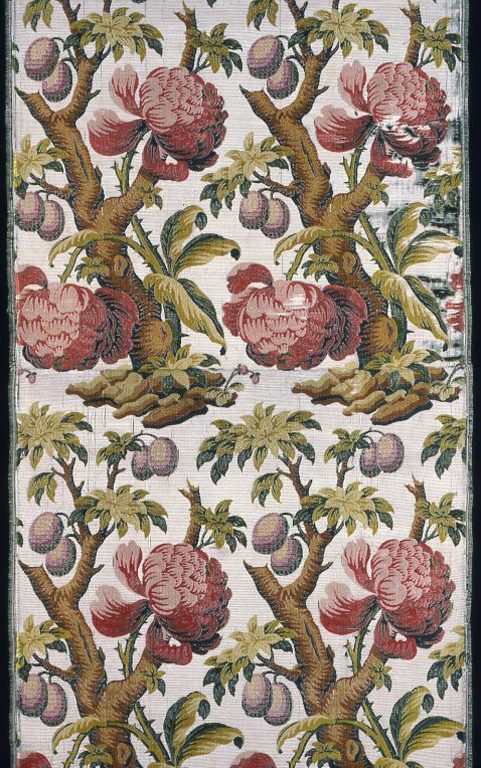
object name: Textile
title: Panel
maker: Design in the style of Courtois (French, active c. 1732–1733); France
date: 1732/33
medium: Silk, plain weave with supplementary patterning warps, supplementary facing wefts and brocading wefts, and self-patterned by two-color complementary ground wefts; two fragments pieced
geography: France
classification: textile; weaving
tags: flowers, botanical/floral